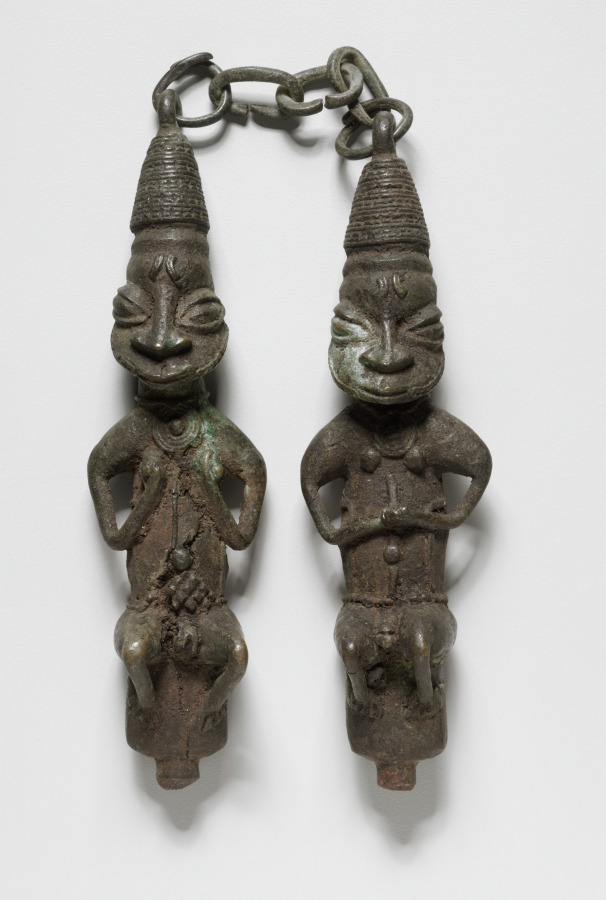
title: Pair of Ritual Staffs (ẹdan Ògbóni)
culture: Africa, West Africa, Nigeria, Yorùbá-style maker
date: possibly 1800s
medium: Copper alloy and iron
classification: Sculpture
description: The chain connecting these two figures allows them to be worn in public by a member of the Ògbóni or Òṣùgbó association as authority emblems. The male on the right gives the association’s typical salute by clasping his left fist on the right one, while the female on the left holds her breasts as a sign of welcome and generosity. The use of copper alloy and iron expresses Ògbóni/Òṣùgbó's concerns with longevity and durability.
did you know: Imagine how this would look when its owner wore it; the chain would go around the back of the neck and the figures would rest on their chest.